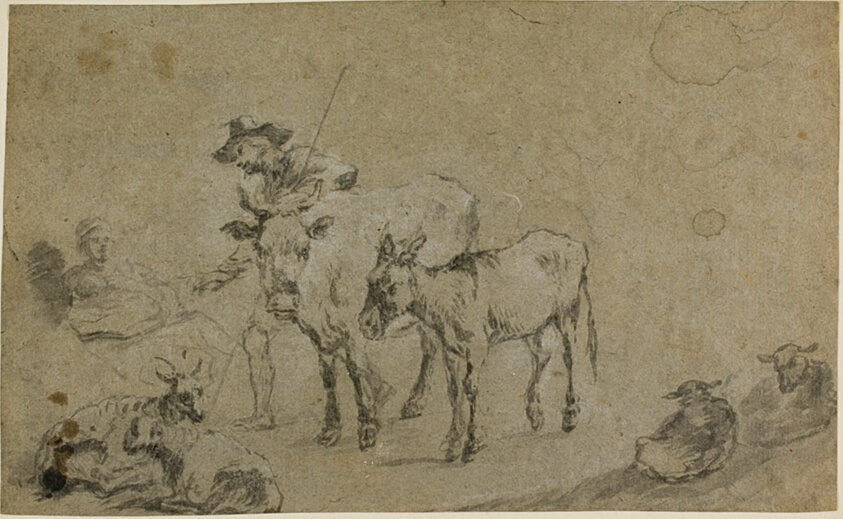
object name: Drawing and Watercolor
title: Herdsman with Cow, Donkey, Sheep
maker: After Nicolaes Berchem; Dutch, 1620-1683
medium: Brush and brown wash, heightened with white chalk, on brown laid paper, laid down on card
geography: Holland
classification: ink or chalk wash; drawings (visual works); prints and drawing